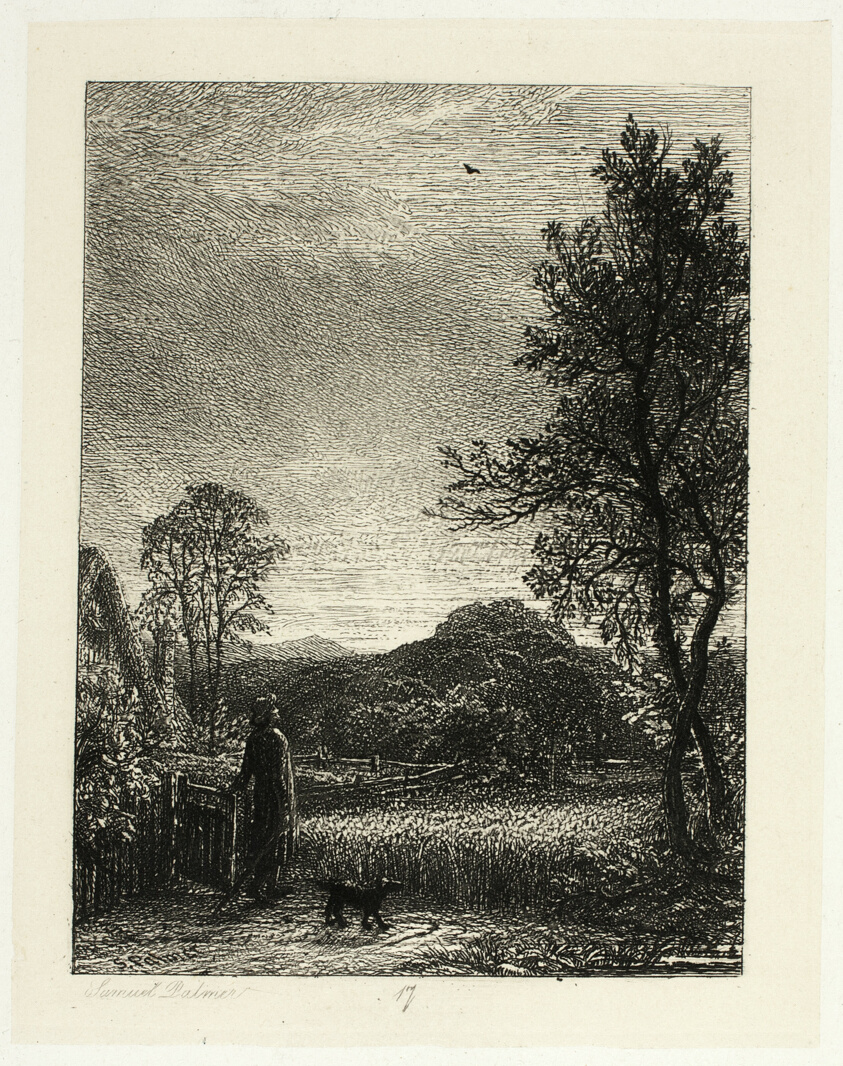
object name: Print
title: The Skylark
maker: Samuel Palmer (English, 1805-1881)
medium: Etching in black on paper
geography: England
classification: etching; print; prints and drawing